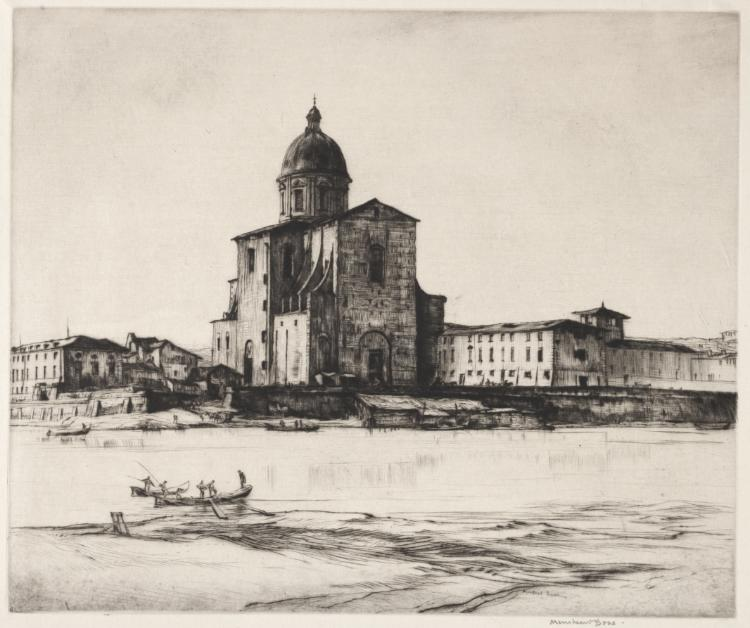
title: San Frediano in Cestello, Florence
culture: England, 20th century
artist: Muirhead Bone (British, 1876–1953)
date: 1915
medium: drypoint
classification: Print